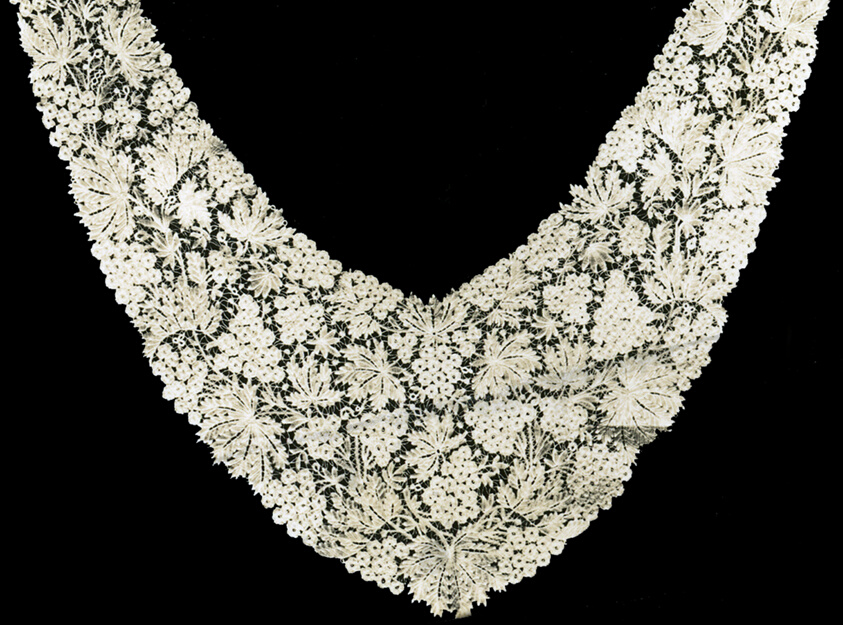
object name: Textile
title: Cape Collar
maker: Belgium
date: 1875/1900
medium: Cotton, bobbin part lace of a type known as "Duchesse de Bruxelles"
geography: Belgium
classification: textile; lace - bobbin; lace